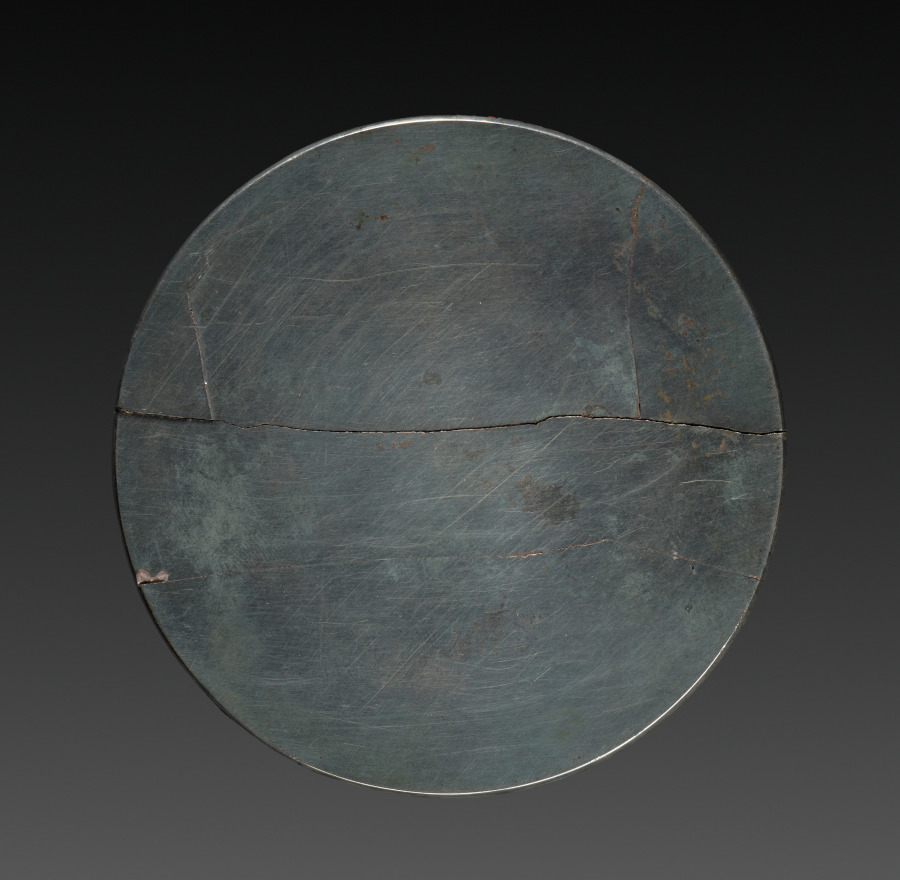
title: Mirror with Paulownia Tree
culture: Japan, Muromachi period (1392–1573)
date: 1392–1573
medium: bronze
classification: Metalwork